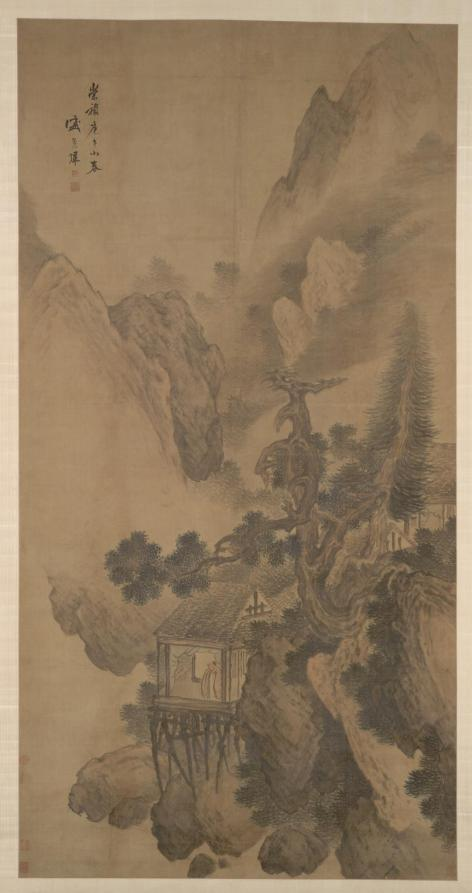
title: Lonely Retreat Overlooking a Misty Valley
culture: China, Ming dynasty (1368–1644)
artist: Sheng Maoye (Chinese, active early 1600s)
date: 1630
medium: hanging scroll; ink and slight color on silk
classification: Painting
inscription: Artist's inscription, signature, and 2 seals: In the tenth month of the gengwu year of the Chongzhen era [1630]. Sheng Maoye [seals] Sheng yin Maoye; Yuhua shi.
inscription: 4 additional seals of Liu Shu (1759–1816)